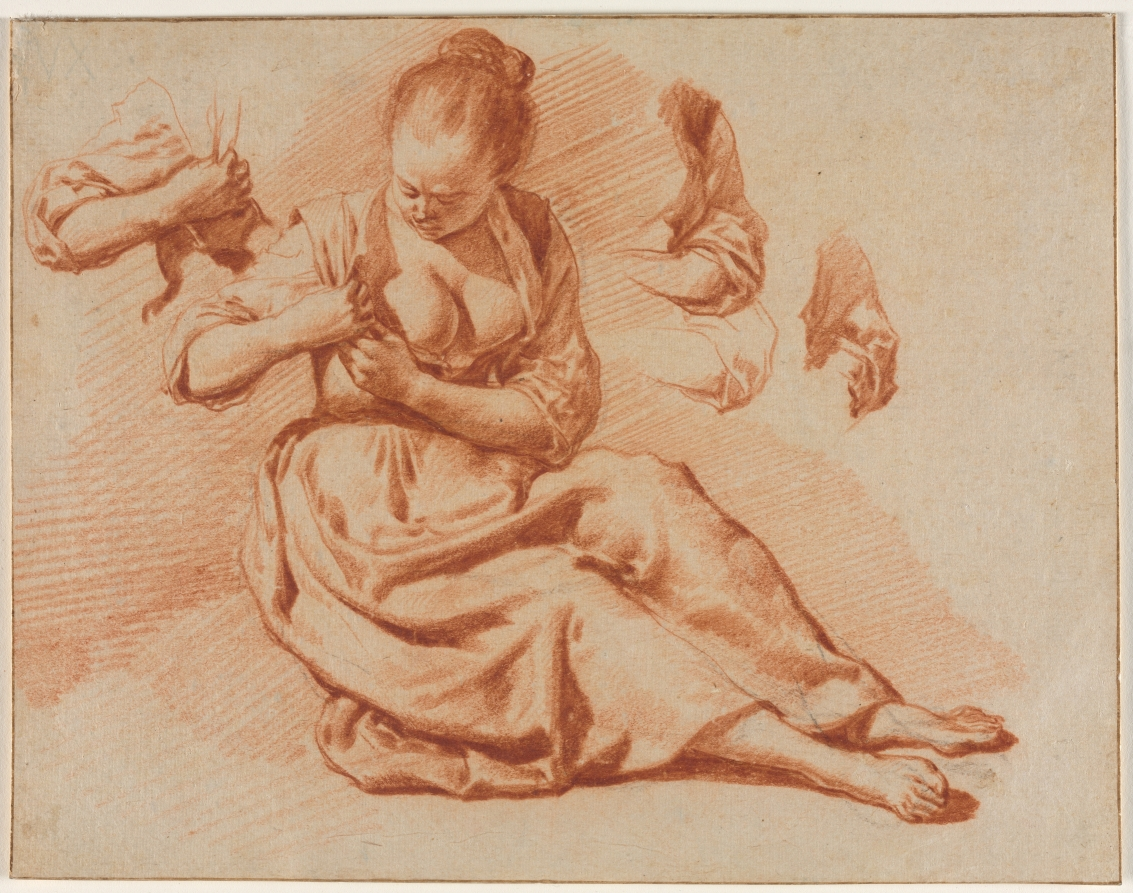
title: Seated Woman Searching for Fleas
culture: Netherlands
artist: Adriaen van de Velde (Dutch, 1636–1672)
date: c. 1671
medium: red chalk over black chalk; framing lines in pen and brown ink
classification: Drawing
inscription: upper left, in blue pencil: VX ; VERSO OF QUATERNARY SUPPORT, upper center, in graphite: [mln?][upside down]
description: Born into a prominent family of Dutch marine painters, Adriaen van de Velde was admired as a landscape painter. He specialized in atmospheric pastoral scenes that feature livestock and rustic figures drawn from life. This intimate study of a shepherdess searching for fleas exemplifies the artist’s skilled use of red chalk to capture the effects of light and shade.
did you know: Considered mere nuisances for those living in close proximity to animals, fleas would only become known as carriers of such illnesses as the bubonic plague almost 200 years after this drawing was made.